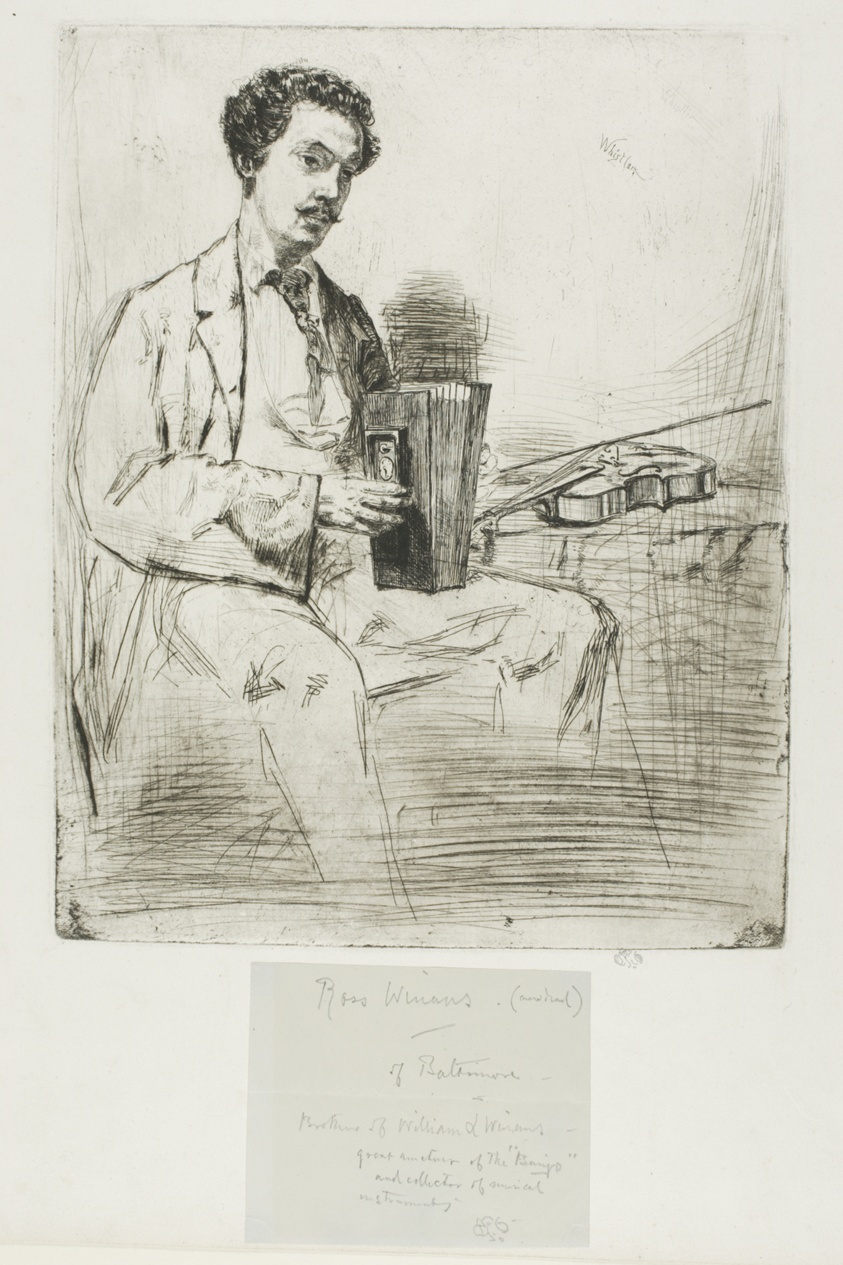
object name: Print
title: Ross Winans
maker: James McNeill Whistler (American, 1834-1903)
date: 1860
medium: Etching and drypoint with foul biting in black ink, with graphite additions along shoulder and sleeve at left, on off-white wove paper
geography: United States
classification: etching; drypoint; foul biting; print; prints and drawing; paper